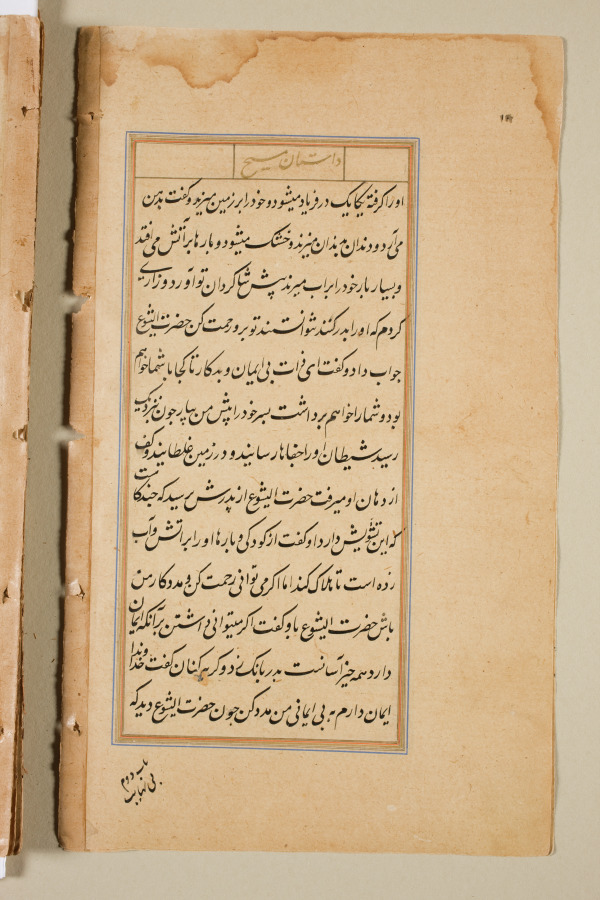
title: Text page from a Mirror of Holiness (Mir’at al-quds) of Father Jerome Xavier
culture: Mughal India, Allahabad, made for Prince Salim (1569–1627)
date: 1602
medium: Ink and gold on paper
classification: Manuscript